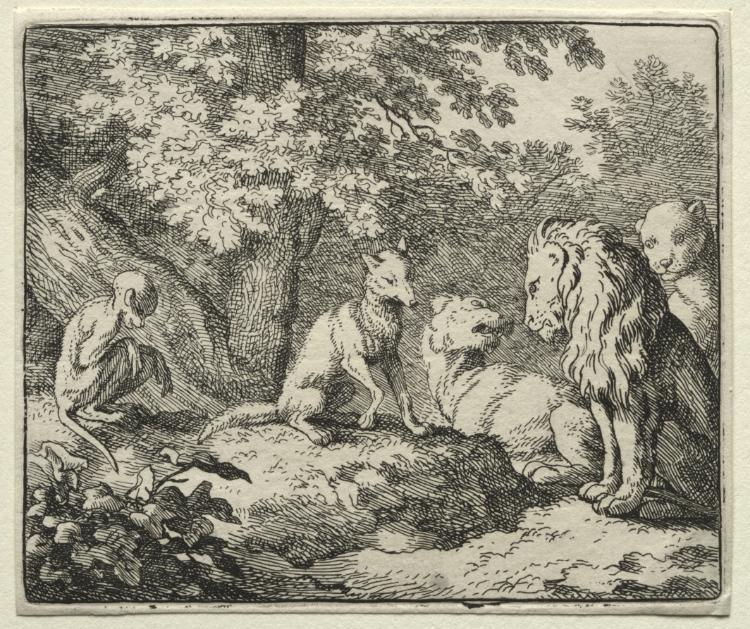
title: Reynard the Fox: Further False Testimony from Reynard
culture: Netherlands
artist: Allart van Everdingen (Dutch, 1621–1675)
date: 1650–75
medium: etching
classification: Print